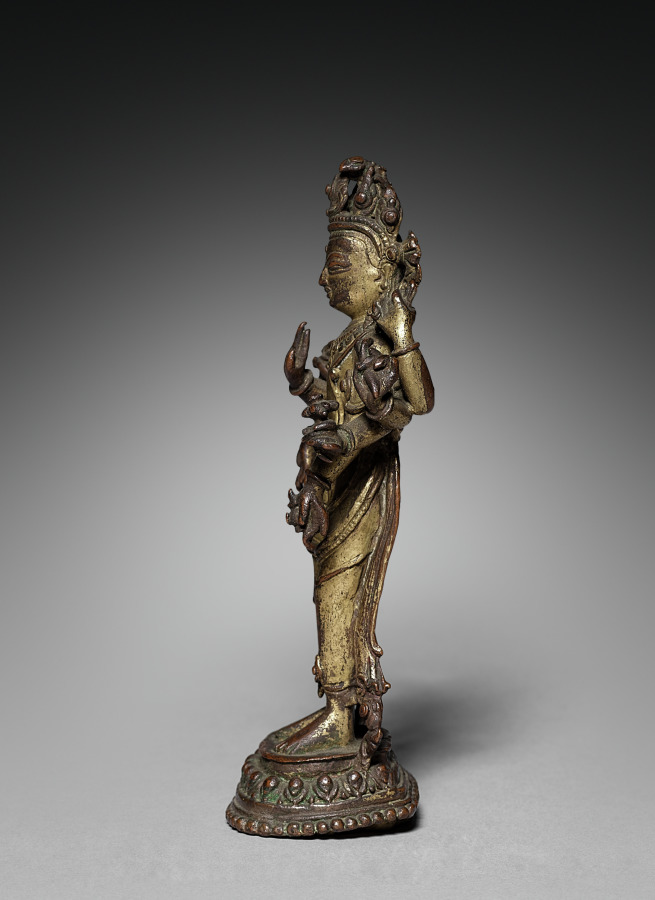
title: Lokesvara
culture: Nepal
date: 1600s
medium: gilded copper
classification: Sculpture